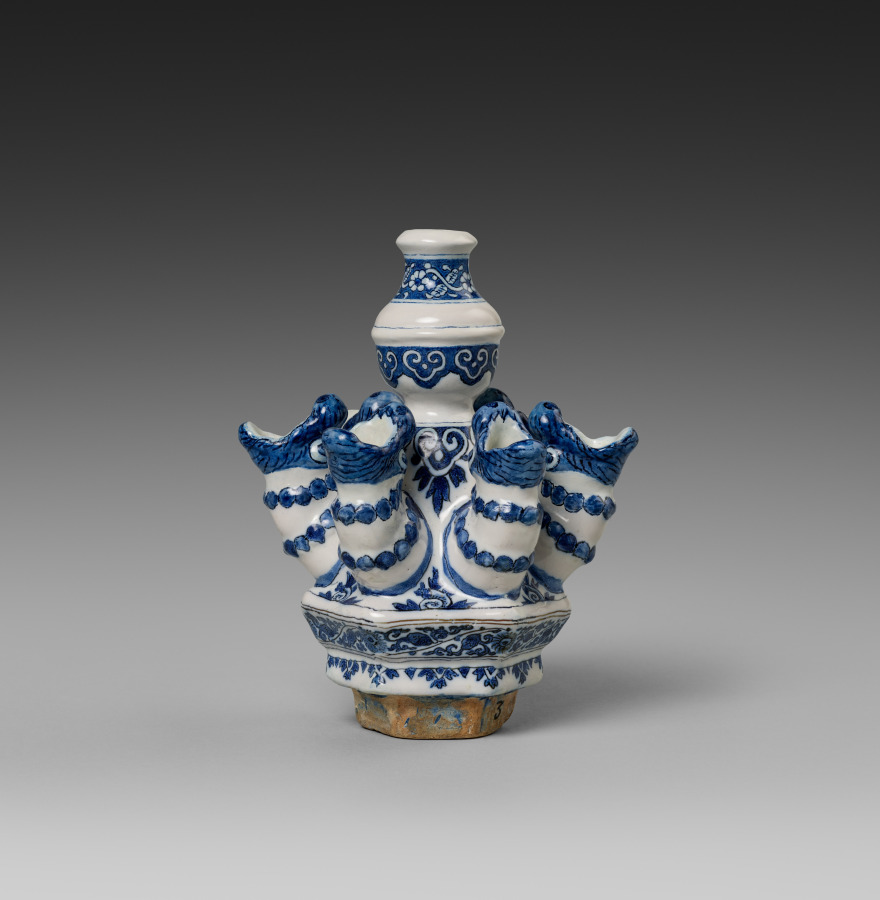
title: Sixth Tier for a Flower Pyramid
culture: Netherlands, Holland, Delft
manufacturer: Adrianus Kocx (Dutch, active 1686–1701)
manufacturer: De Grieksche A (The Greek A) Factory (Netherlands, 1658–1811)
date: c. 1690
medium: Tin-glazed earthenware, painted in blue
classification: Ceramic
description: Allegorical figures representing Faith, Hope, and Love decorate the base of this pyramid, on which rest six tiers with spouts where flowers can be placed. Flower pyramids are among the most complex and luxurious types of ceramics produced in Delft in the late 1600s. This example was made in the Greek A Factory, owned by Adrianus Kocx. During his tenure, the factory became the most prestigious of Delft potteries and received commissions from Queen Mary II, who ruled over England, Scotland, and Ireland together with her husband, William III. She contributed to the international spread of the fashion for Delft ceramics.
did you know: The iconic blue-and-white ceramics from Delft originated as an attempt to copy Chinese porcelain.